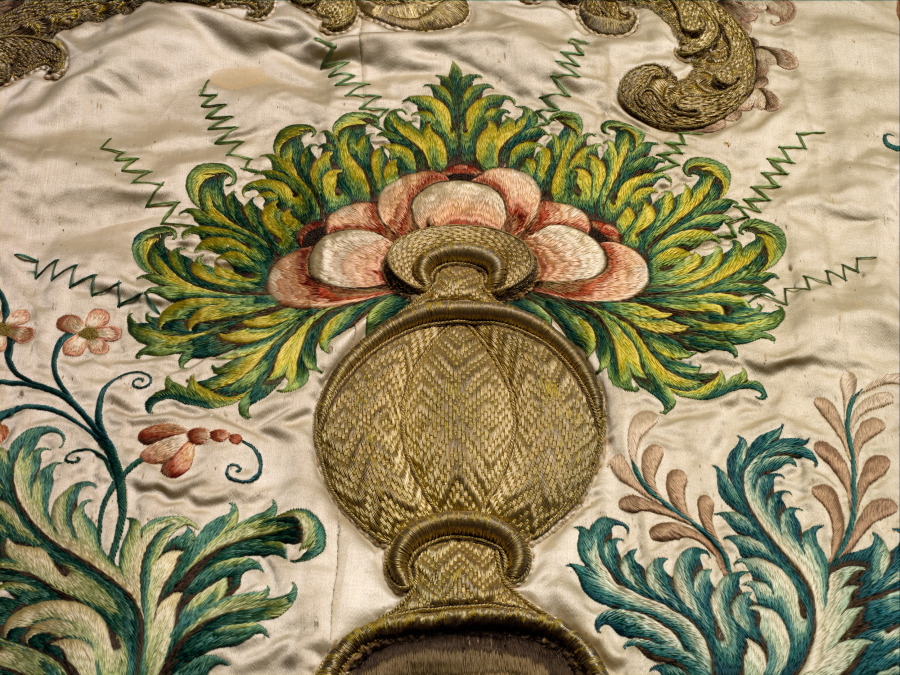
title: Embroidered Front of an Altar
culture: Italy or Spain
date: 1600s–1700s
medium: Satin and silk: embroidery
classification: Embroidery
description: This spectacular cloth with raised three-dimensional embroidery embellished the front of an altar. Lavishly applied gilt-metal thread creates architectural embellishments enhanced by grand vases displaying sheaves of wheat in the upper corners and bunches of grapes in the center of the fringed over-frontal, referring to the bread and wine of the Mass. The central coat of arms represents the Order of the Blessed Virgin Mary of Mercy, a Roman Catholic mendicant order established in 1218 by Saint Peter Nolasco in the city of Barcelona, Spain, then in the principality of Catalonia (crown of Aragon).